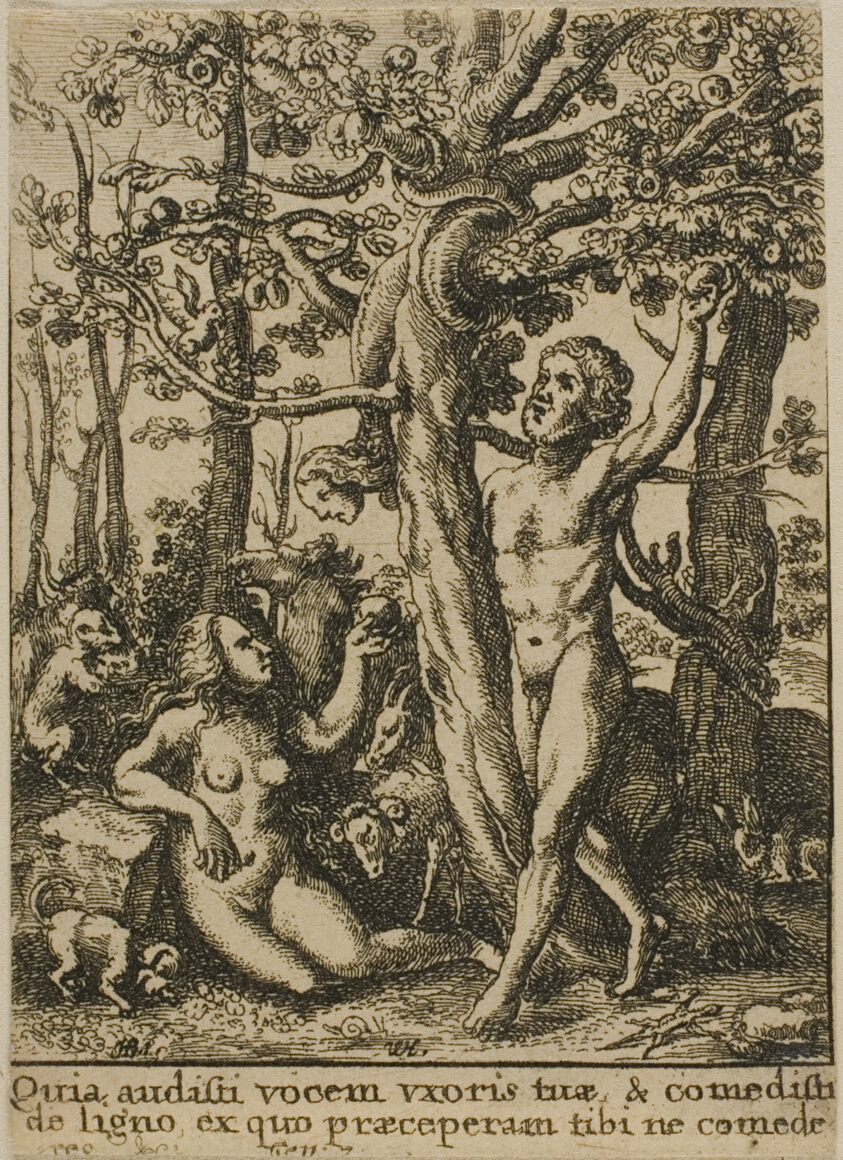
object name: Print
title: The Garden of Eden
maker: Wenceslaus Hollar (Bohemian, 1607-1677); after Hans Holbein the younger (German, c.1497-1543)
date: 1651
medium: Etching on ivory wove paper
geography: Bohemia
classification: etching; print; prints and drawing